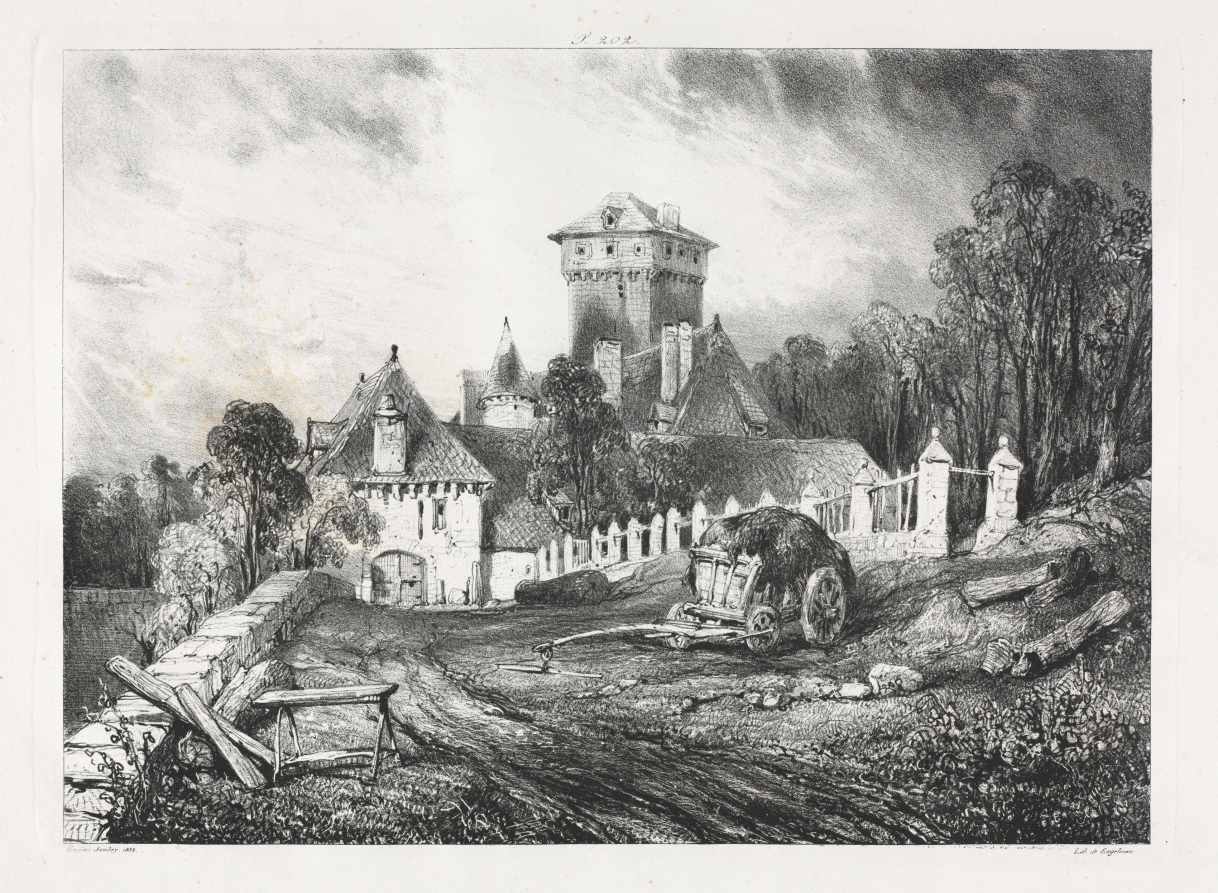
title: Voyages pittoresques et romantiques dans l'ancienne France, Auvergne: Château de Pesteil à Polminhac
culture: France, 19th century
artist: Eugène Isabey (French, 1803–1886)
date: 1832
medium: lithograph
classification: Print